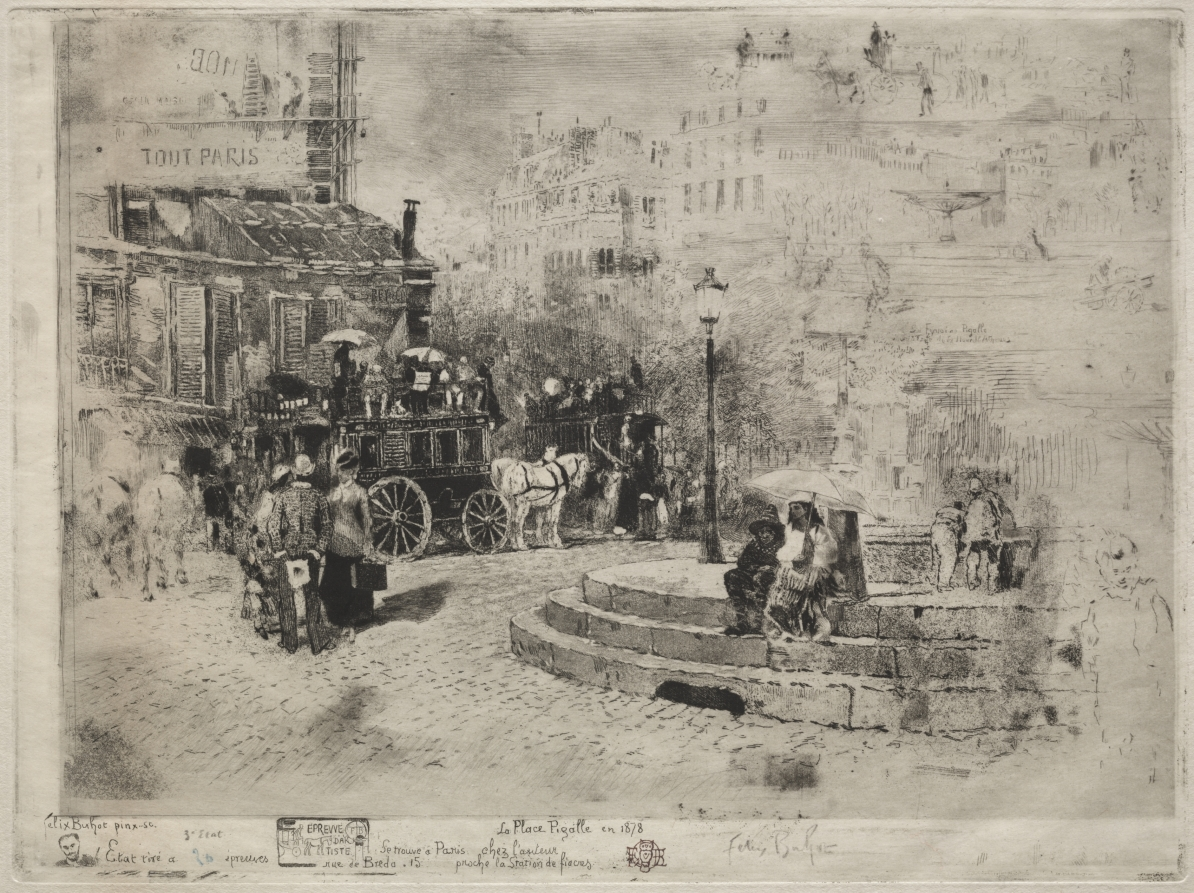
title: Place Pigalle en 1878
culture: France, 19th century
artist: Félix Hilaire Buhot (French, 1847–1898)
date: 1878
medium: etching, drypoint and aquatint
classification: Print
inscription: signed, lower center, in graphite: "Felix Buhot"; inscribed lower left, in graphite: "3e etat"; lower left, in plate: "Felix Buhot pinxt. sc./ Etat tiré a 20 épreuves" (20 is inscribed in blue pencil); lower center, in plate: "La Place Pigalle en 1878/ Se trouve a Paris chex l'auteur/ rue de Breda 15 proche la Station de fiacres"